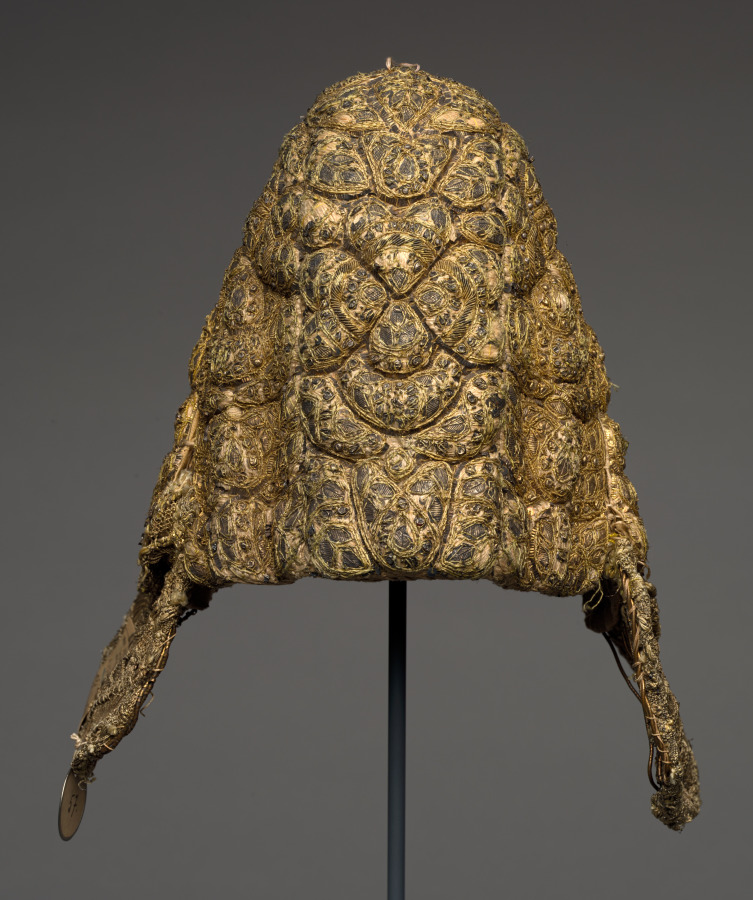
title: Embroidered Peasant Headdress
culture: Germany, Nüremberg, 18th century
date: 1700s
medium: embroidery, gold thread; edged with gold lace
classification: Garment